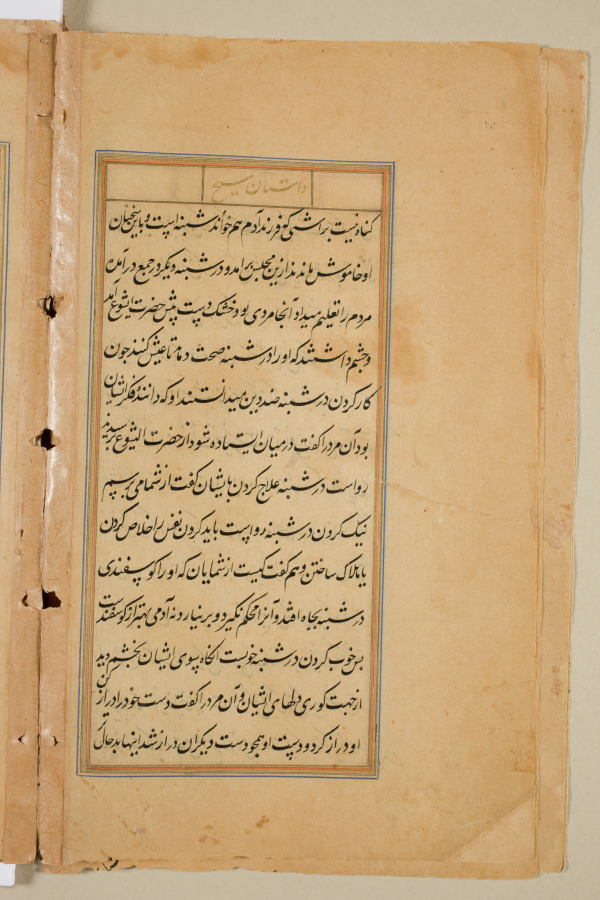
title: Text page from a Mirror of Holiness (Mir’at al-quds) of Father Jerome Xavier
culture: Mughal India, Allahabad, made for Prince Salim (1569–1627)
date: 1602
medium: Ink and gold on paper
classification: Manuscript